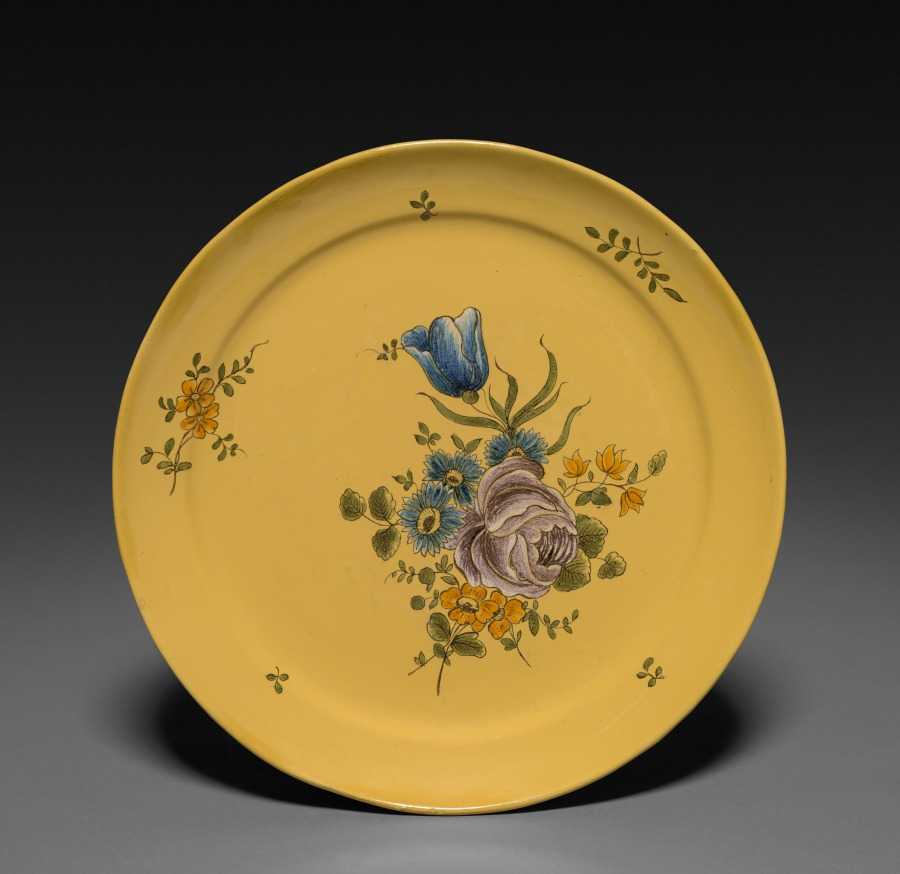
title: Plate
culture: France, Moustiers, 18th century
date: c. 1770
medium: faience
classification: Ceramic